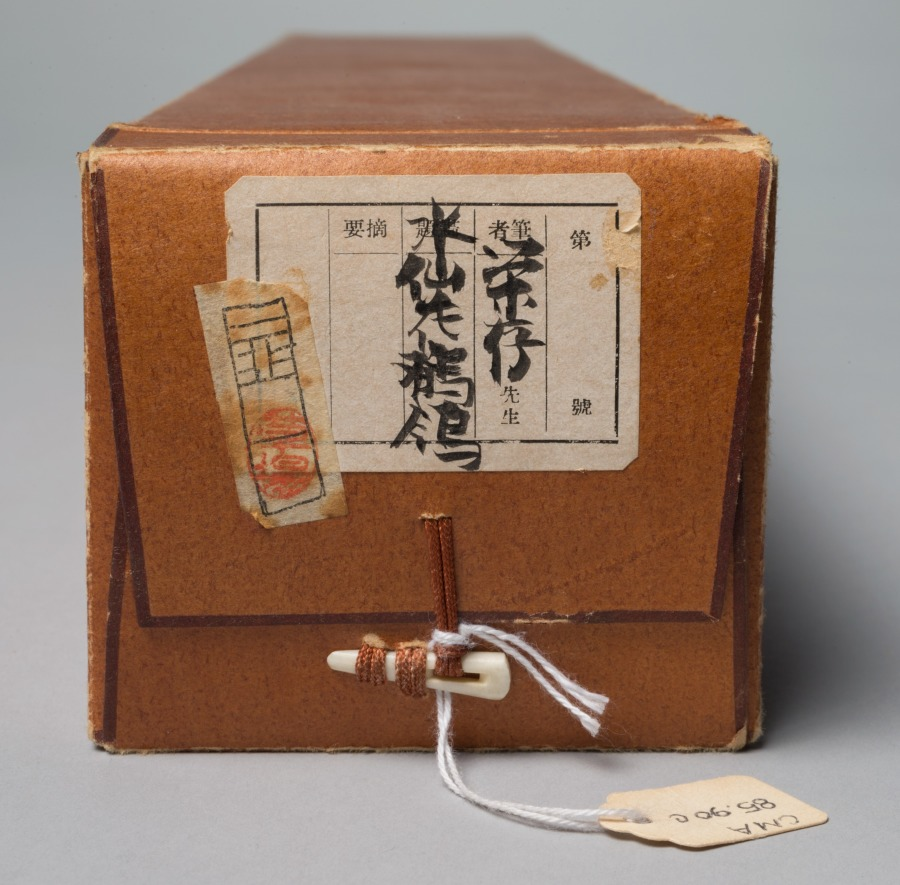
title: Wagtails and Narcissus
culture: Japan, Muromachi period (1392–1573)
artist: Eison (Japanese)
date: mid-1500s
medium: hanging scroll; ink on paper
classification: Painting